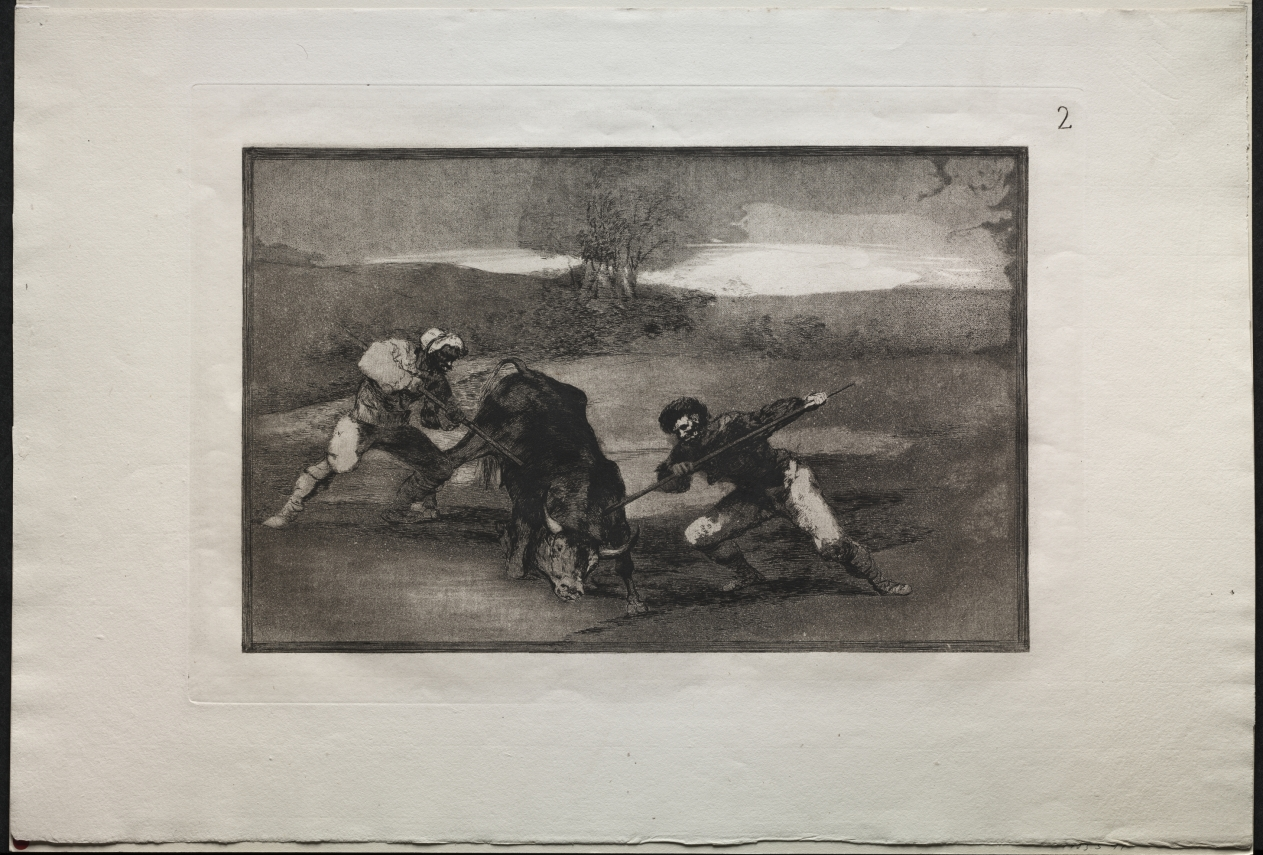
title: Bullfights: Another Way of Hunting on Foot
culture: Spain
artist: Francisco de Goya (Spanish, 1746–1828)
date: 1816, printed 1876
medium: engraving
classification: Print